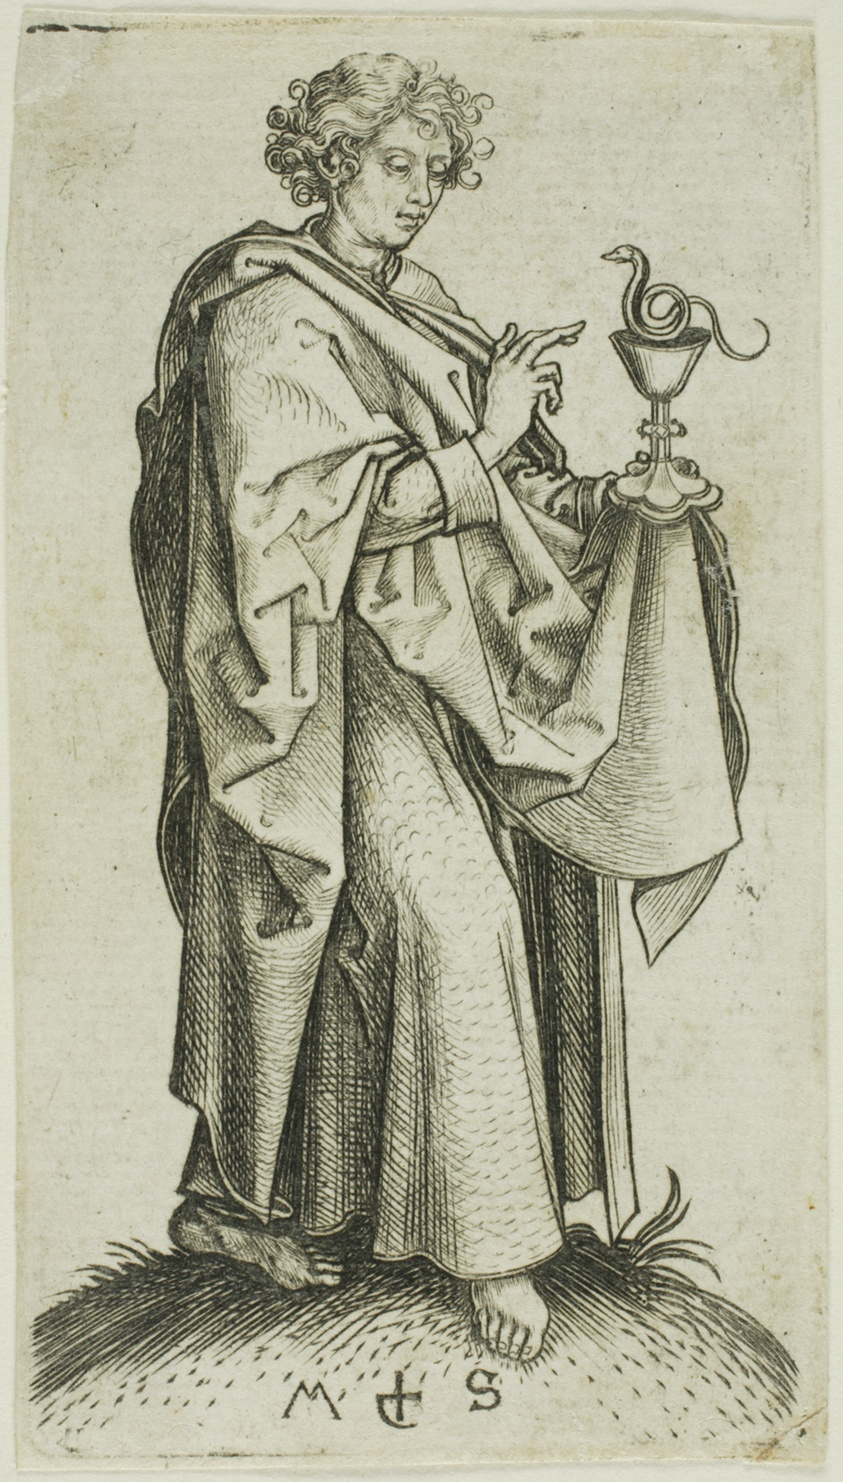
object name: Print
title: St. John, from Apostles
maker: Martin Schongauer (German, c. 1430/50-1491)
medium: Engraving on paper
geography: Germany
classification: engraving; print; prints and drawing